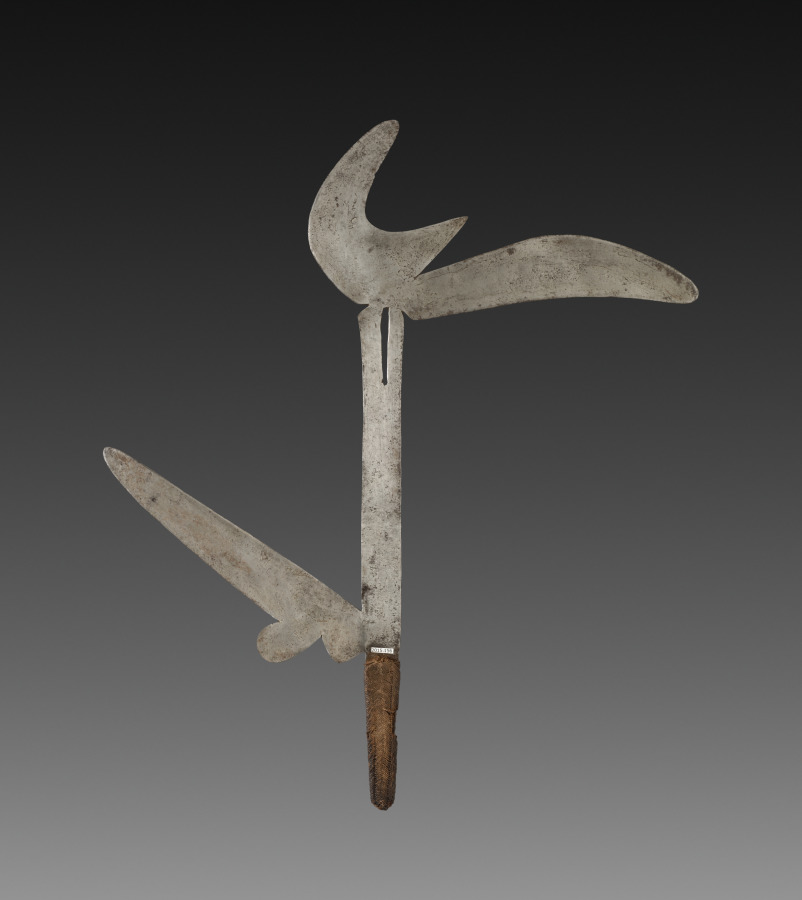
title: Throwing Knife / Prestige Scepter (pingha)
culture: Africa, Central or Eastern Africa, Democratic Republic of the Congo, Central African Republic, and Sudan, Zande-style maker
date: 1800–mid-1900s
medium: Iron alloy and plant fiber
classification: Arms and Armor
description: Throwing knives (pingha, plural kipinga) were historically used by elite Zande men as weapons in the late 1800s and early 1900s. Carefully calibrated, they would spin when thrown or balance on the shoulder when taken into battle. Kipinga were not everyday weapons, but considered property of the king; only those fighting on his behalf like royal bodyguards and court attendants used them. One side of this blade is adorned with complex figural and geometric engravings. No longer used for fighting, kipinga are now a sign of authority and heritage.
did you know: Look closely at the upper blade of this throwing knife to find a representation of a lizard, and at the lower part of the shaft for a crosshatch design resembling lizard skin.